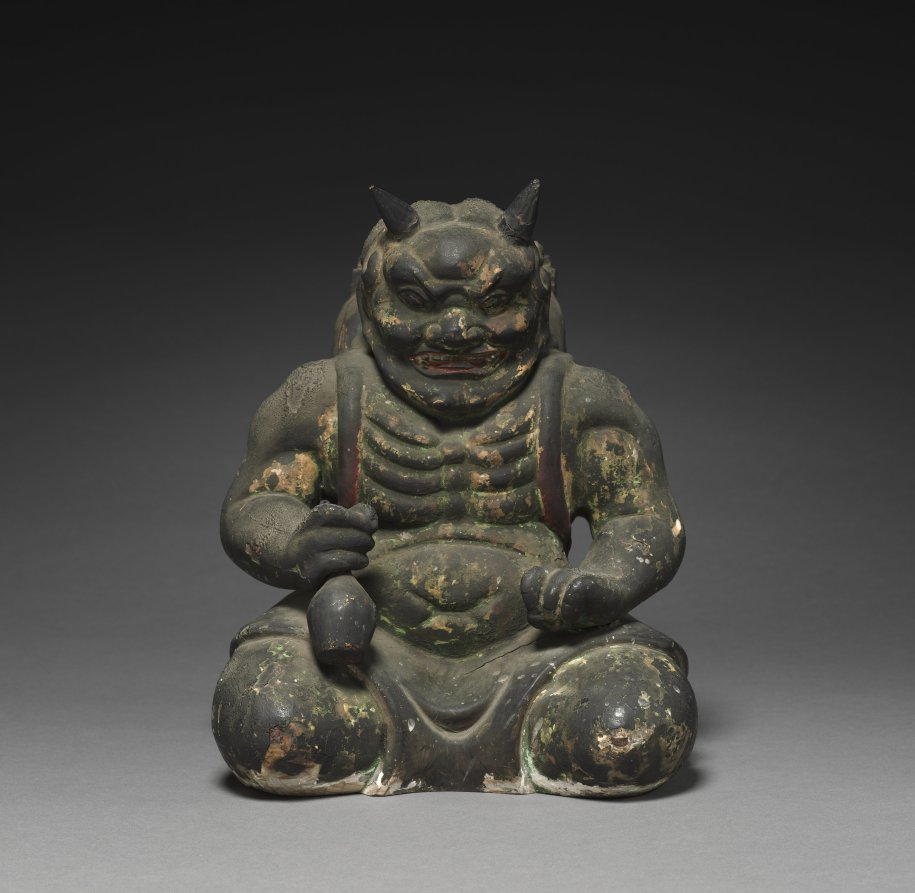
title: Seated Koki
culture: Japan, Muromachi period (1392–1573)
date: 1400s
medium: wood with pigment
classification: Sculpture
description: The axe-wielding red Zenki, and the vase-holding, bamboo backpack-wearing green Koki are both under the mystical control of the monk, En no Ozunu (legendarily 634–701), also known as En no Gyōja, or “En the Ascetic,” considered to have founded Shugendō, a style of religious practice focused on performing austerities in mountainous settings.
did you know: This sculpture was hand-carved and covered with gesso, then paint in green, white, red, yellow, orange, and black, and gilded in select areas.